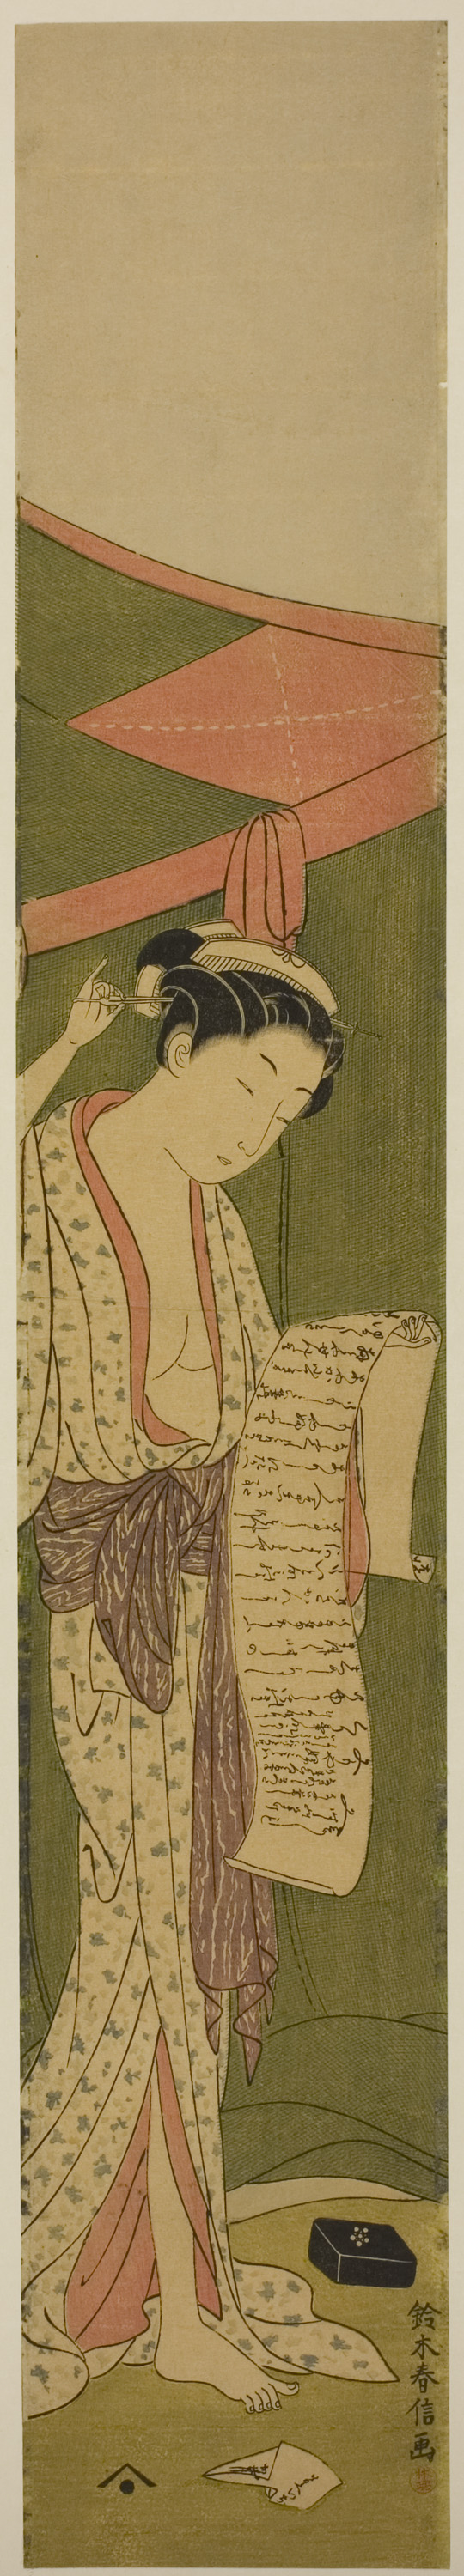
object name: Print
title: Woman Standing beside a Mosquito Net Reading a Letter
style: Japanese (culture or style)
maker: Suzuki Harunobu 鈴木 春信; Japanese, 1725 (?)-1770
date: c. 1768/69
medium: Color woodblock print; hashira-e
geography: Japan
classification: woodblock print; print; asian art